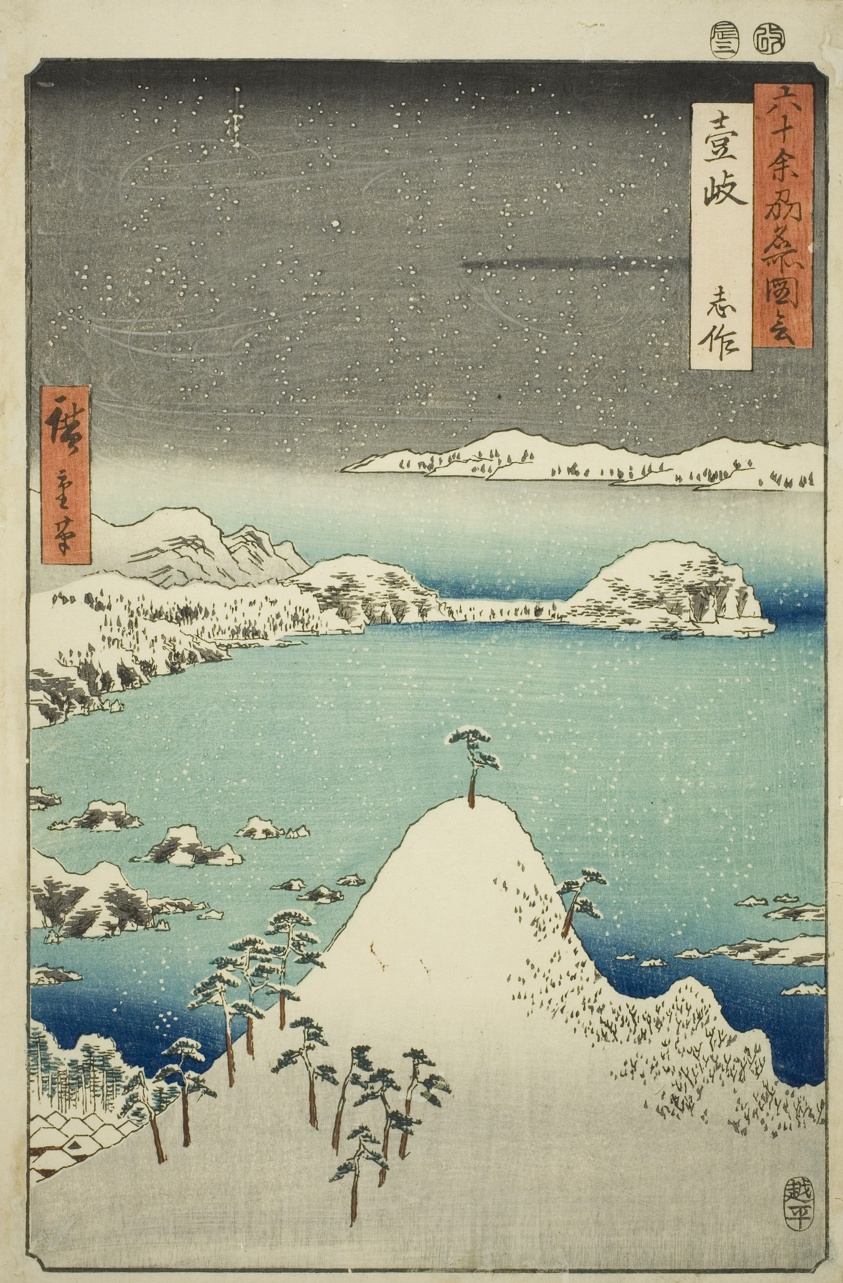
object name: Print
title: Iki Province: Shisa (Iki, Shisa), from the series "Famous Places in the Sixty-odd Provinces (Rokujuyoshu meisho zue)"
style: Japanese (culture or style)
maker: Utagawa Hiroshige 歌川 広重; Japanese, 1797-1858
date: 1856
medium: Color woodblock print; oban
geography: Japan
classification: woodblock print; print; asian art